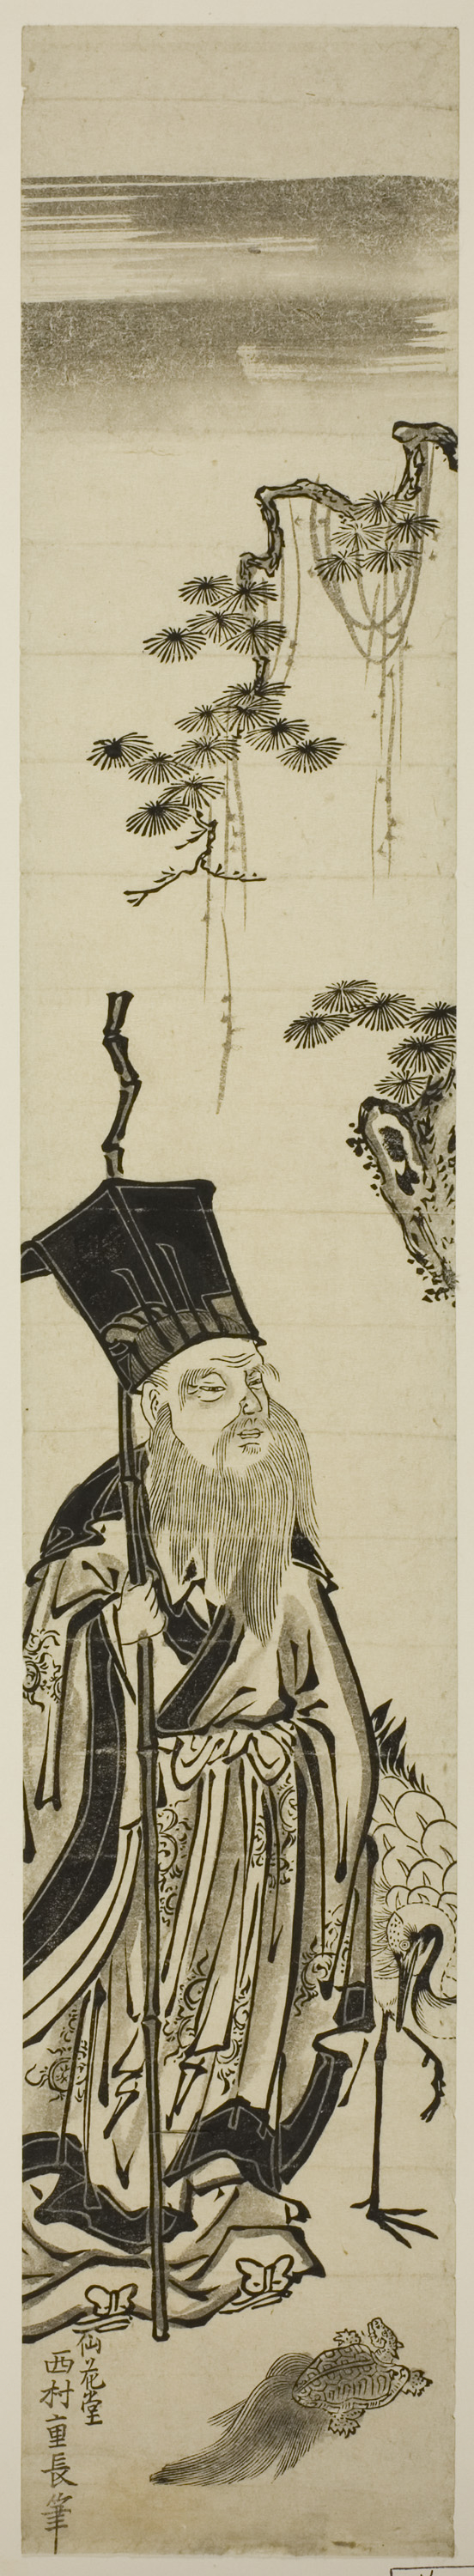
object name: Print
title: Jurojin with crane and tortoise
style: Japanese (culture or style)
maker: Nishimura Shigenaga (Japanese, 1697 (?)-1756)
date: 18th century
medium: Woodblock print; hashira-e, sumizuri-e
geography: Japan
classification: woodblock print; print; asian art; woodblock